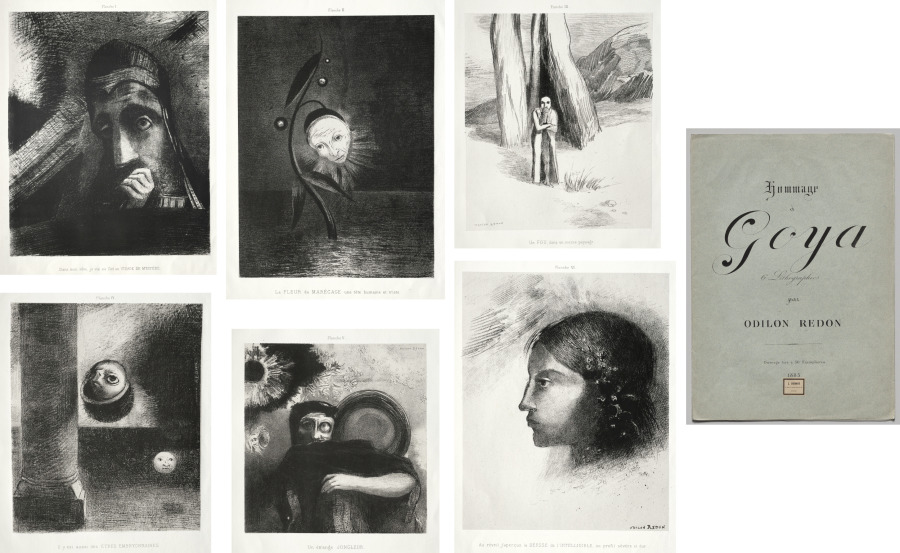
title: Homage to Goya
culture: France, 19th century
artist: Odilon Redon (French, 1840–1916)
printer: Lemercier & Cie.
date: 1885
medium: six lithographs on China paper laid on wove paper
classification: Print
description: This series is one of many that Odilon Redon created throughout his career. Nearly two-thirds of his lithographs took the form of portfolios—prints connected conceptually by a theme or narrative and physically by a folder or binding. Such works were often dispersed over time, but Cleveland was fortunate to acquire several complete sets with their original covers during the 1920s. Dating from Redon’s early experimentation with lithography, Homage to Goya was intended as a tribute to 18th-century Spanish master Francisco de Goya, whose interest in dreams and the subconscious influenced Redon. The six seemingly unrelated images celebrate Goya’s ambiguity and collectively suggest the introspection and isolation of artistic practice.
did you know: This portfolio was published in an edition of 50, one of which Redon sent to poet Stéphane Mallarmé soon after Redon became a frequent participant in a literary salon held regularly at Mallarmé's home.